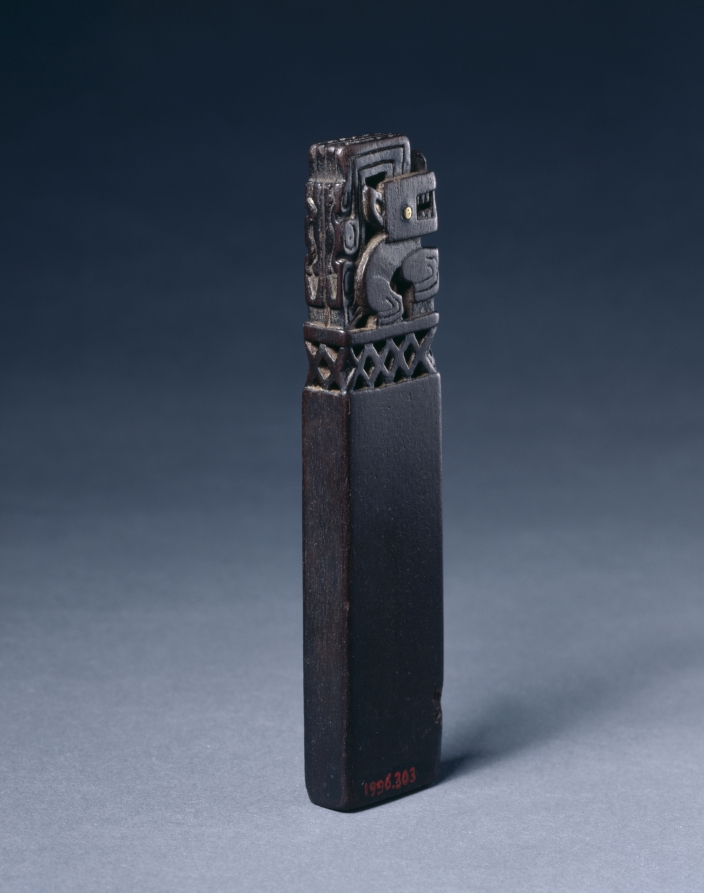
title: Snuff Tablet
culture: Peru, North Highlands, Recuay style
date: 1–650 CE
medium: wood with gold foil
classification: Furniture and woodwork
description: Both of these objects feature a creature known as the "Recuay feline," although it could also refer to a fox, dog, or viscacha (a rodent). Whatever its identity, the prominent crest on its head ties it to the supernatural realm, a connection underlined by the deity head that also appears on the dipper and by the ritual function of snuff tablets, which were used to inhale hallucinogenic snuffs during religious ceremonies.